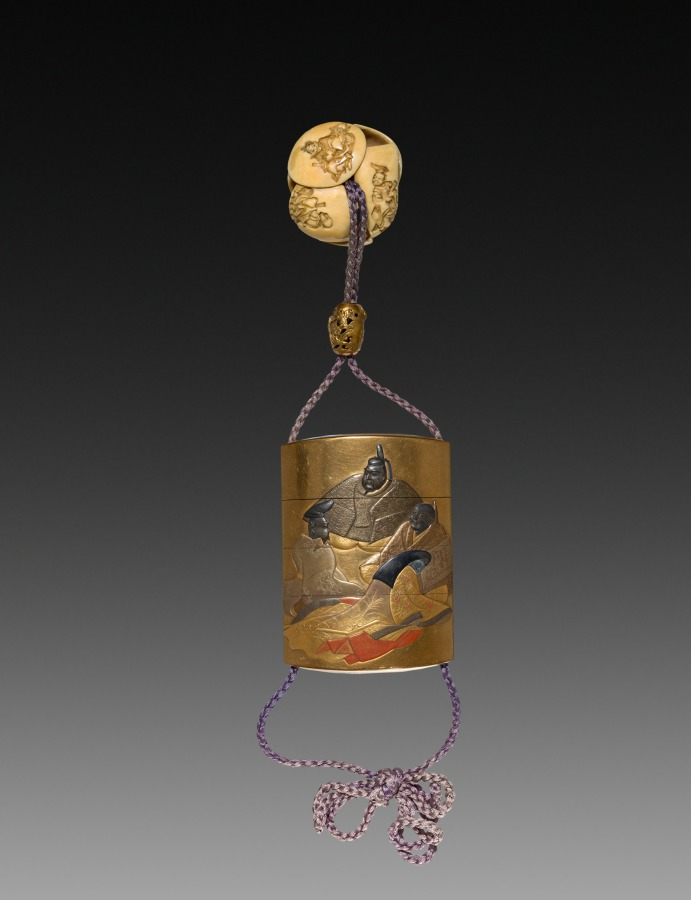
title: Inro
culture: Japan, Edo period (1615–1868)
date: early to mid-1800s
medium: lacquer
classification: Lacquer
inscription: Signature: Yutokusa